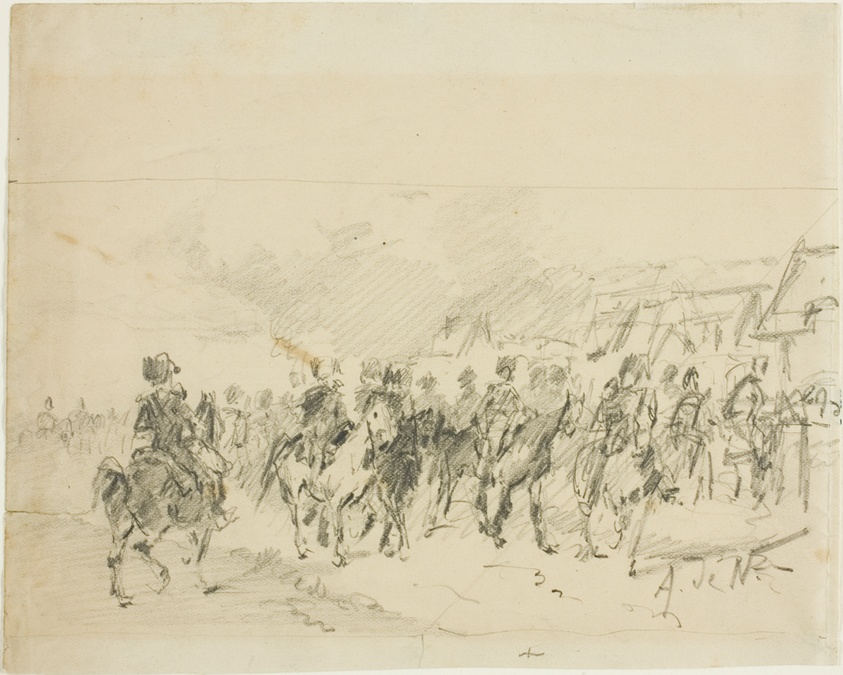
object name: Drawing and Watercolor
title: Man on Horseback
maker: Alphonse Marie Adolphe de Neuville; French, 1835-1885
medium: Graphite on ivory wove paper (discolored to tan)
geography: France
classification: graphite; drawings (visual works); prints and drawing